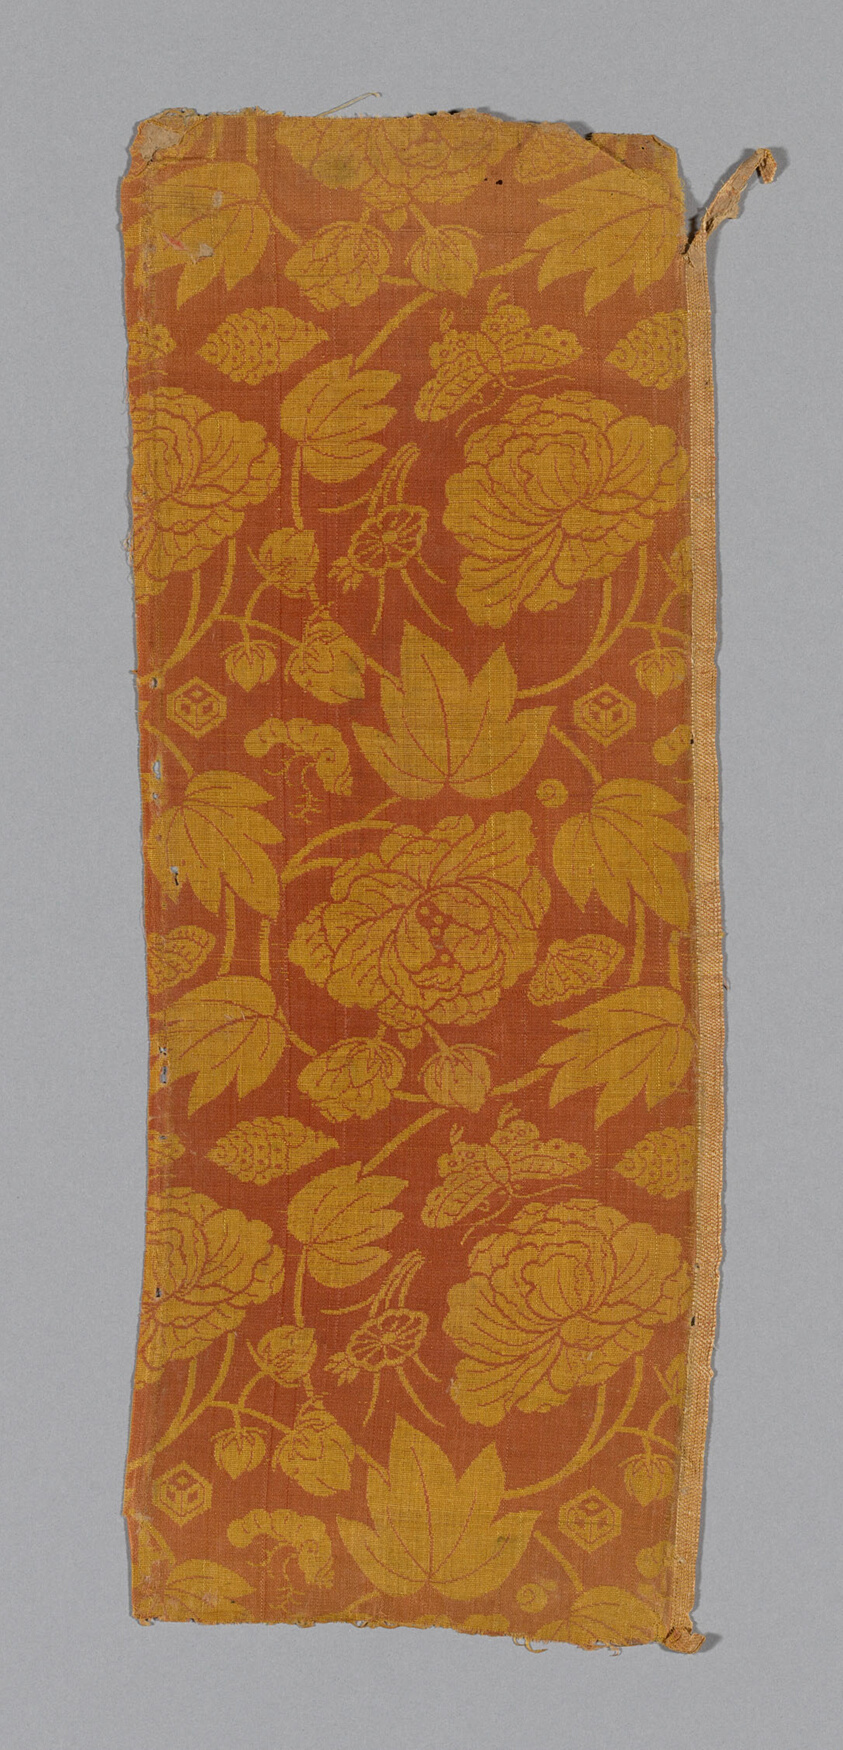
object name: Textile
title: Sutra Cover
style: ming, Chinese (culture or style), East Asian, asian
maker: China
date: Ming dynasty (1368–1644), c. 1590's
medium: Silk, plain weave, double cloth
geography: China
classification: textile; weaving